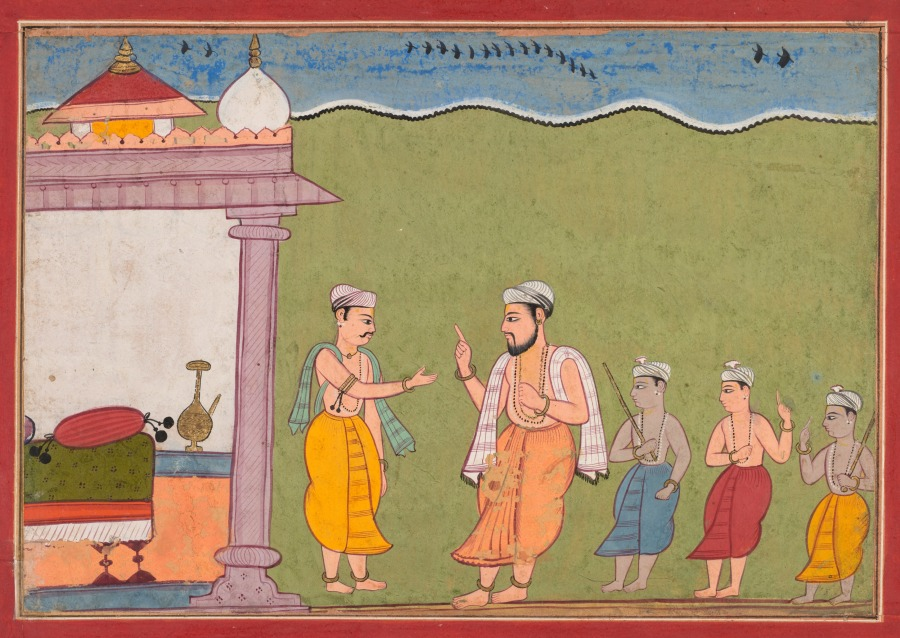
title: Nanda Solves Vasudeva’s Dilemma, from a Bhagavata Purana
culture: Northwestern India, Rajasthan, Rajput Kingdom of Bikaner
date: c. 1610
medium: Gum tempera and gold on paper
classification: Painting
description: Three cowherd boys stand behind their village elder Nanda, who agrees to hide the newborn Krishna, an incarnation of a Hindu god. At the left is Krishna’s father, Vasudeva, who has made this request in order to protect the child from slaughter by the despotic king, who had heard a prophecy that Krishna would one day kill him. This painting is from a series depicting scenes from a sacred Hindu text and was part of the royal Bikaner collection. The simple, geometric composition, profile views, and flat planes of color show adherence to long-standing local artistic styles.